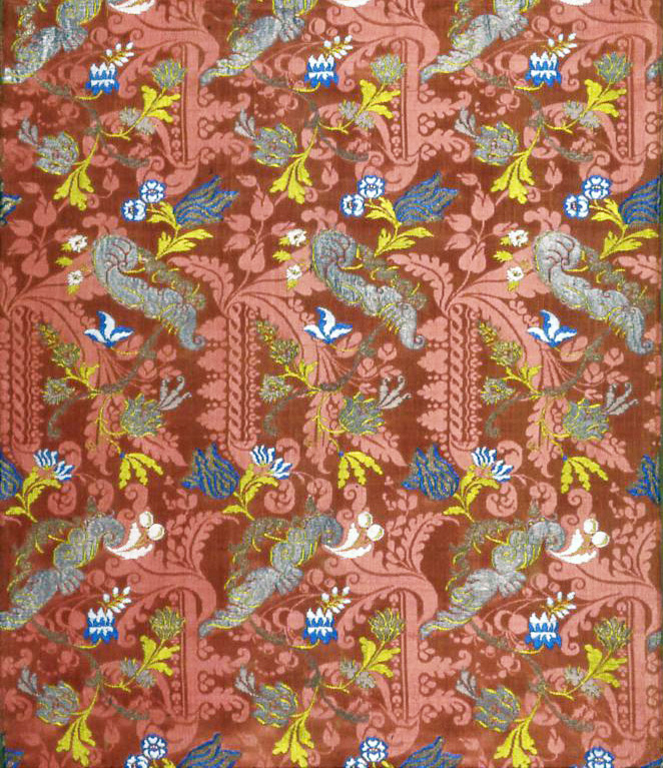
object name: Textile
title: Three Panels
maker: Probably France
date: c. 1710/11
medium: Silk and gilt- and silvered-metal-strip-wrapped silk, warp-float faced 7:1 satin weave with supplementary brocading wefts bound in twill interlacings and self-patterned by ground wefts in twill and plain interlacings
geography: France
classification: textile; weaving